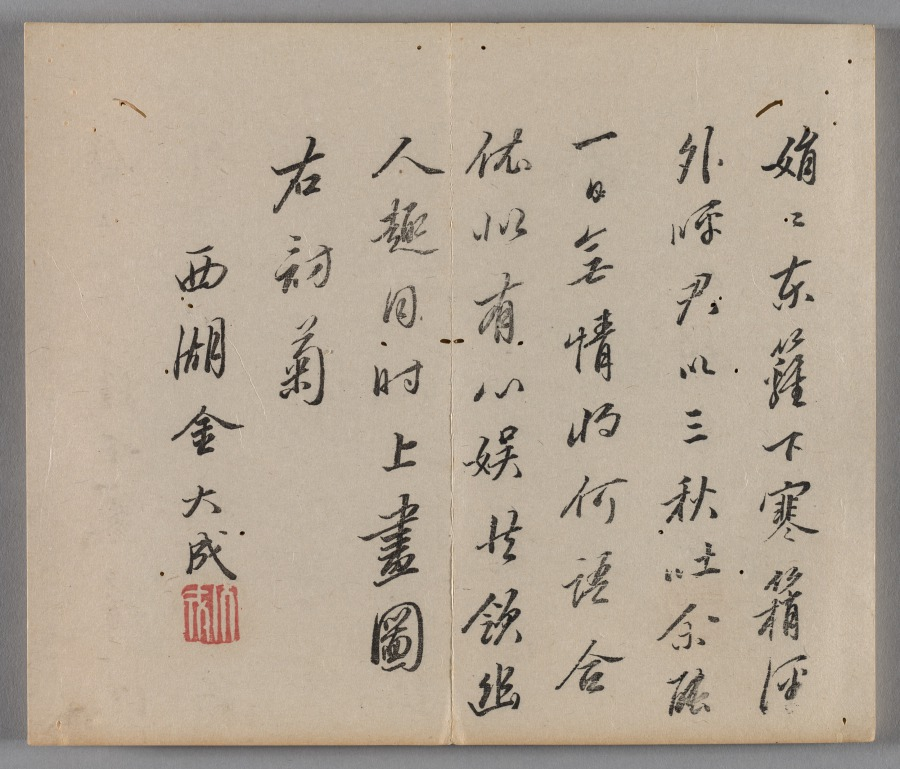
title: Ten Bamboo Studio Painting and Calligraphy Handbook (Shizhuzhai shuhua pu): Bamboo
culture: China, Qing dynasty (1644-1911)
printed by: Hu Zhengyan (Chinese, c. 1584–1674)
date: 1633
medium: Woodblock-printed book; ink and colors on paper; first edition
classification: Print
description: Color printing reached a level of perfection in the early 1600s, as seen in this Ten Bamboo Studio Collection of Calligraphy and Painting and the Mustard Seed Garden Manual of Painting (printed 1679 and 1701). The painterly quality, precision in registering (aligning) the woodblocks, and harmonious colors made them the most successful color print editions in Chinese history. Both editions were printed and compiled in Nanjing, spread nationwide, and had a great impact on the arts in Japan and Korea.